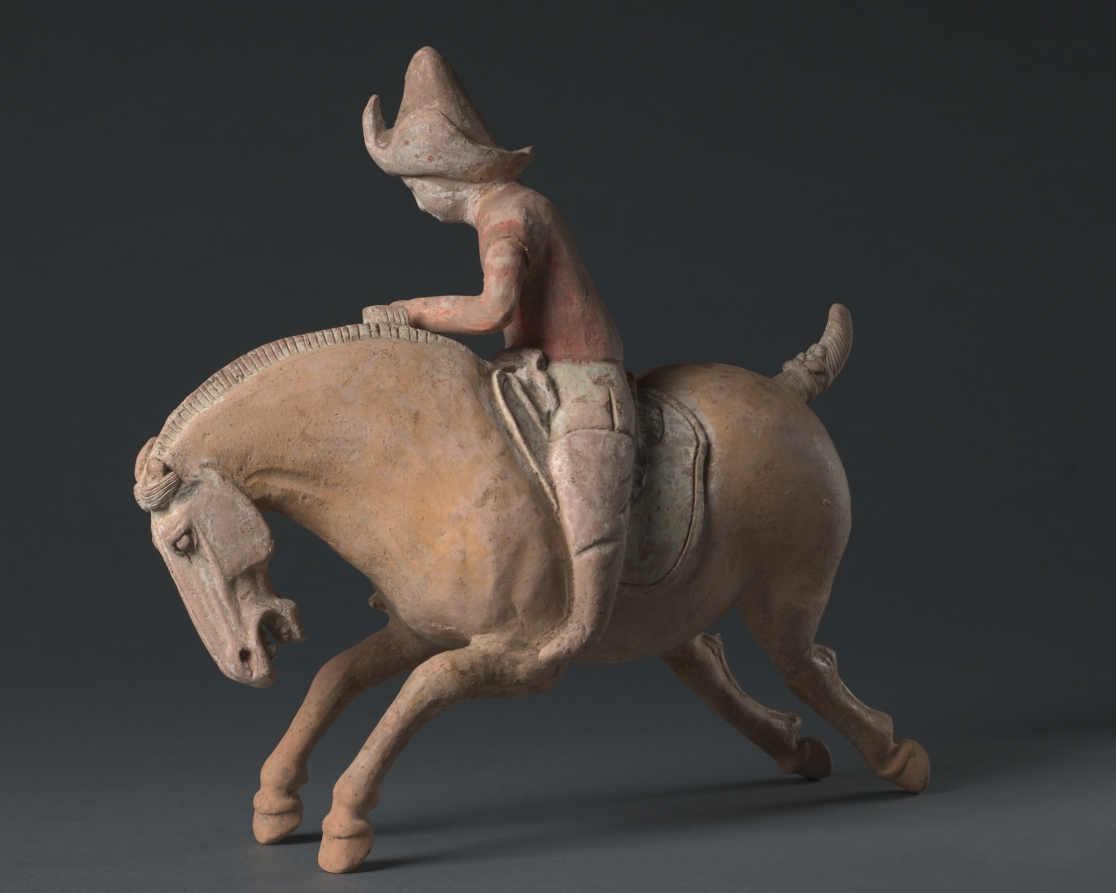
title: Polo Player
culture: China, Tang dynasty (618-907)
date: late 600s-early 700s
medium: painted earthenware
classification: Sculpture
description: An exercise for military troops, polo was also fashionable among men and women of Tang China, and this polo player is actually a woman dressed in a man's riding habit. It is in keeping with the exuberance of the Tang dynasty that such sporting figures of daily life should be among objects for the afterlife.